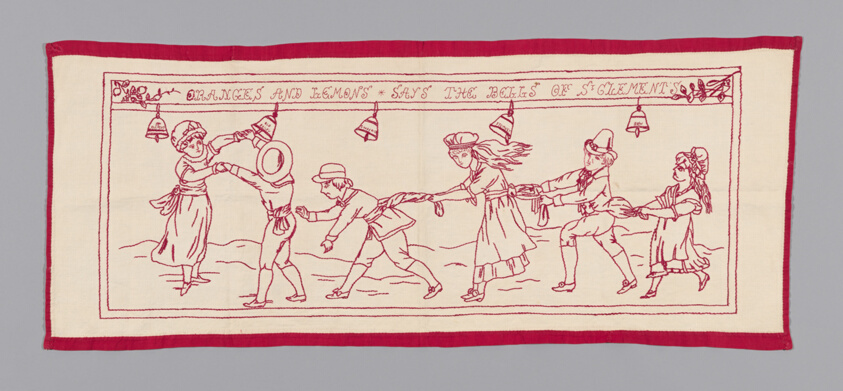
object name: Costume and Accessories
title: Scarf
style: Arts and Crafts Movement, british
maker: England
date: c. 1875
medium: Cotton, extended plain weave; embroidered with cotton in stem, long and short and buttonhole stitches; edge with applied cotton, twill weave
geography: England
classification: textile; needlework (visual works); costume